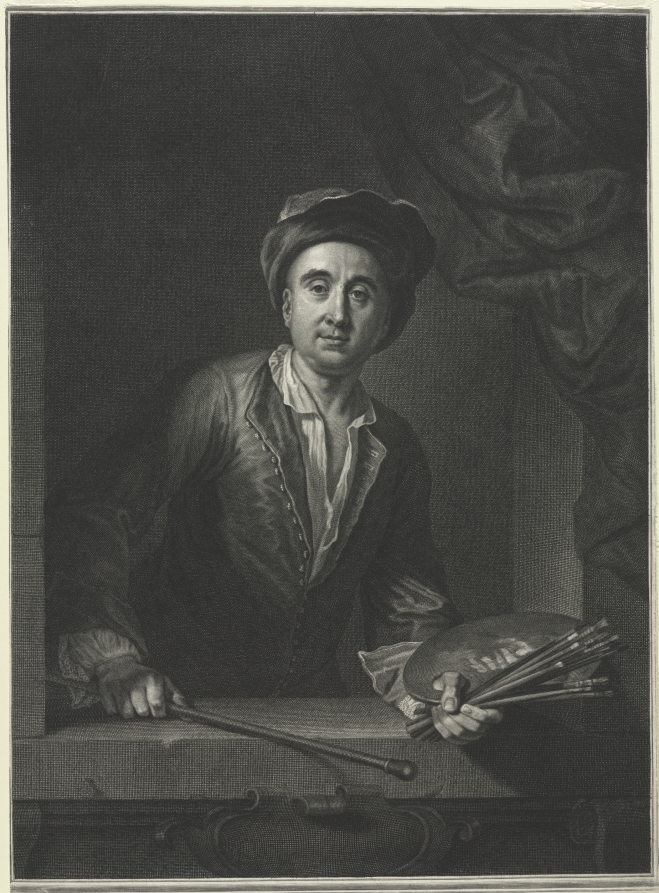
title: François de Troy, after a Self-Portrait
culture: France, 18th century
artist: Pierre Drevet (French, 1663–1738)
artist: after Jean François de Troy (French, 1679–1752)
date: 1738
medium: engraving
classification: Print